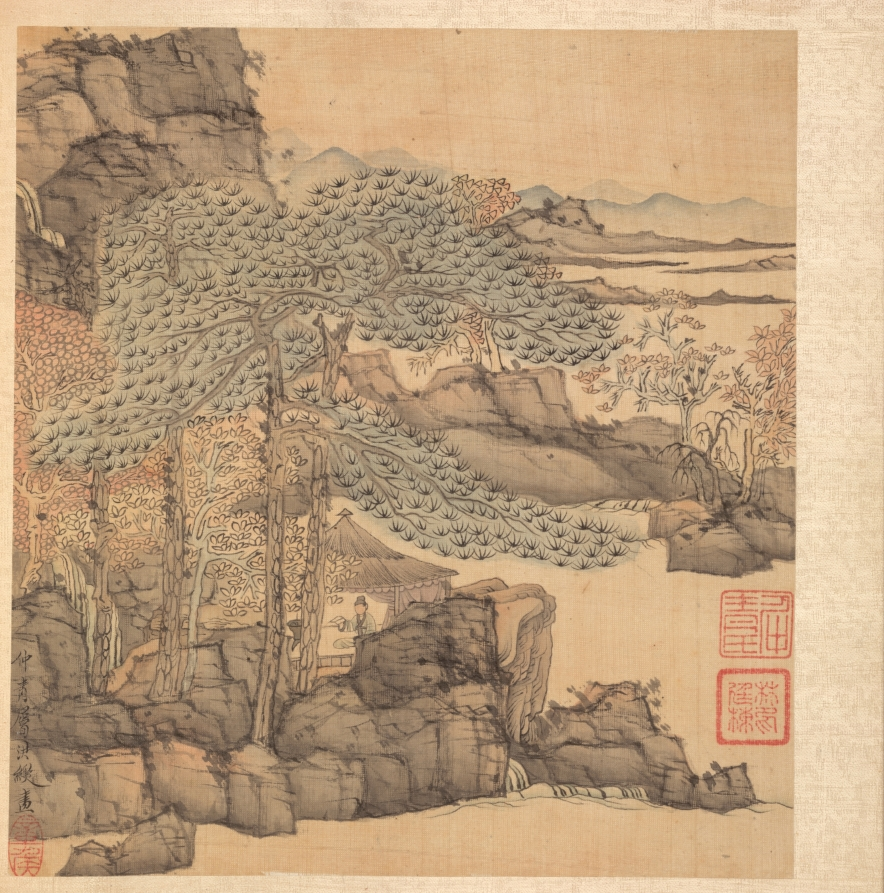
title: Paintings after Ancient Masters: Scholar Reading in a Thatched Hut by a Waterfall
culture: China, Ming dynasty (1368–1644)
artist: Chen Hongshou (Chinese, 1598/99–1652)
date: 1598–1652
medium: album leaf; ink and color on silk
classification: Painting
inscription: Zhongqing entrusted Hongshou to paint. [seal] Zhanghou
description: The twenty paintings in this double-album by Chen Hongshou include landscapes, figures, and flowers. It also has one leaf featuring a woman, an often-used subject not found in the other albums from the latter part of his career. His late works are wonderful summations of Chen's peculiar and quirky art--archaistic, hyper-refined--but without accompanying shallowness or sentimentality. His figures and landscapes in the late albums are miniaturized, not unlike the small Chinese gardens, or the carefully selected small table rocks or old roots used for contemplation to see the world in miniature. This loss of scale is quite deliberate and reflects the psychological situation of a depressed class like the Ming loyalist officials and scholars, deprived of their integrity and honor, and forced to lead a diminished and restricted existence.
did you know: Chen Hongshou dedicated this album of 20 paintings to his friend Lin Zhongqing.